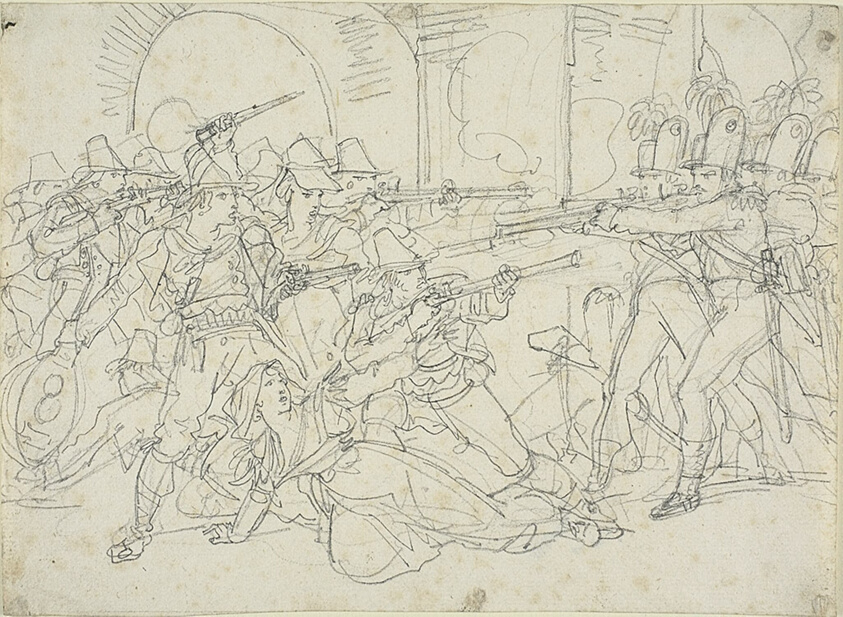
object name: Drawing and Watercolor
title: Study for Events of the Life of Massaroni, an Italian Bandit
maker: Bartolomeo Pinelli (Italian, 1781-1835)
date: 1823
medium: Graphite, on ivory laid paper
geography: Italy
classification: graphite; drawings (visual works); prints and drawing